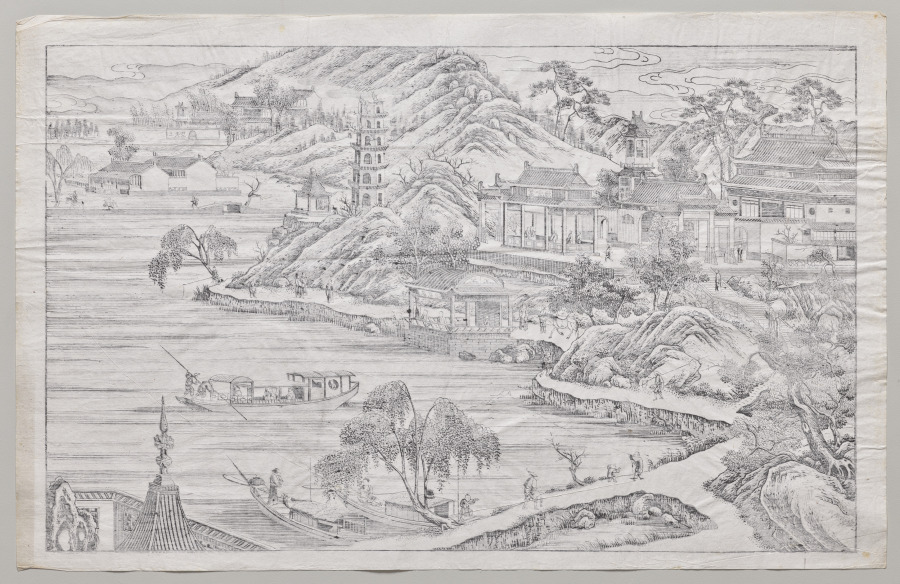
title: Westlake Panorama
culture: China, Qing dynasty (1644–1911), Qianlong reign (1736–95)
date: mid-1700s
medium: One of four woodblock prints; ink on paper; printed with three woodblocks in shades of black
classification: Print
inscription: 信德號 姑蘇管瑞玉頂細西洋畫發客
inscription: The 10 scenes on the four prints are identified by their titles: Print one: 1. Remnant Snow on Broken Bridge (Duanqiao canxue, 斷橋殘雪), 2. Lotus Breeze at Qu Winery (Quyuan fenghe, 曲院風河 [sic]). Print two: 3. Autumn Moon over Placid Lake (Pinghu qiuyue, 平湖秋月), 4. Twin Peaks Piercing the Clouds (Liangfeng chayun, 兩峰插云), 5. Spring Dawn at Su Dike (Sudi chunxiao, 蘇 堤春曉), 11. The emperor’s temporary palace (xinggong, 行宮). Print three: 6. Listening to the Orioles by the Willow Ripples (Liulang wenying, 柳浪 聞鶯), 7. Three Stupas and the Reflecting Moon (Santan yinyue, 三潭印月). Print four: 8. Watching Fish at Flower Cove (Huagang guanyu, 花港觀魚), 9. Sunset at Leifeng Pagoda (Leifeng xizhao, 雷峰夕照). 10. Evening Bell from Nanping Hill (Nanping wanzhong, 南屏晚鍾.) In print two, 11. the emperor’s temporary palace (xinggong 行宮) is also identified.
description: Revived by the southern imperial inspection tours, West Lake imagery became a popular subject during the early Qing dynasty. This panorama is composed of four prints, showing the Ten Scenes of the West Lake in Hangzhou along with other sights. The vanishing point perspective and the hatching lines that depict shading, water, or sky derive from European copperplate prints, introduced by missionaries to China, and were celebrated novelties in 18th-century Suzhou prints. These prints also reached Europe to furnish 18th-century palace interiors.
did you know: Woodblock printing in color reached a height in China in the 1600s to 1700s. The prints were executed by means of sets of separate blocks, each carved to print a different color.